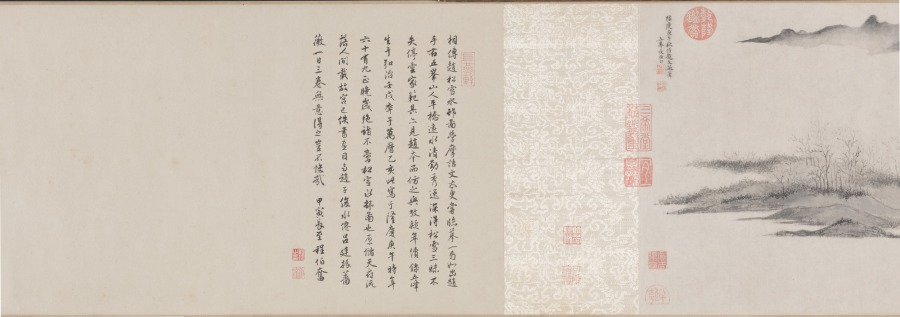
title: Water Village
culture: China, Ming dynasty (1368–1644)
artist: Wen Boren (Chinese, 1502–1575)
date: 1570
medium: handscroll; ink and light color on paper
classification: Painting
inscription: 隆慶庚午秋仿趙文敏筆. 五峰文伯仁 [印] 五峰山人; 文伯仁印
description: In the autumn of 1570, Wen Boren painted this seemingly unemotional scene of low-lying marshlands with a chain of rounded mountains in the background. A fishing boat is nestled on the shore near the village. Although paths and bridges traverse the landscape, only two people are visible in the stillness. From the restrained atmosphere of this landscape, one would never guess that Wen Boren was known as the “bad boy” of the Wu School for his explosive temper. As a younger man, he was even embroiled in a contentious lawsuit with his own uncle, Wen Zhengming (1470–1559), a master of Ming dynasty painting with whom he had trained. The ideal of the scholar-painter, or literati, was that an artist’s moral character is reflected in his paintings, so there was great incongruity between Wen Boren’s difficult personality and his restrained landscapes. A contemporary, Wang Shizhen, wrote this about him: "This gentleman is prone to behave odiously and screamed accusations at people. How is it possible for him to carry in his bosom such a wealth of scenic wonders?" Who knows what effort it took to subdue his fractious spirit to project an image of coolness and refined taste in his paintings?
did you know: A foreground tree has an eccentric twisting silhouette and pepper-dot "halo" of leaves.